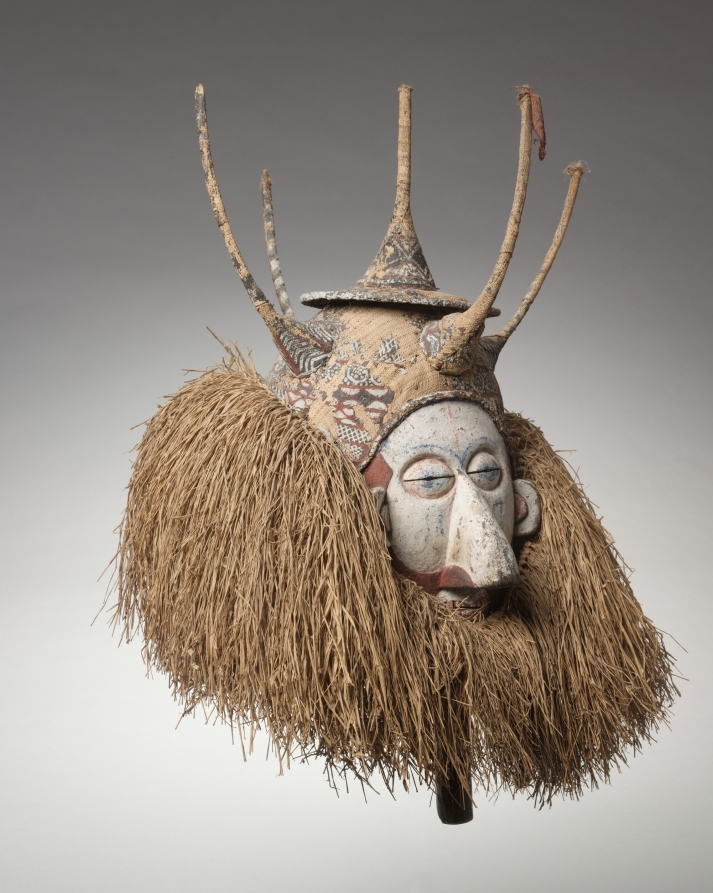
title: Mask (ndeemba)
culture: Africa, Central Africa, Democratic Republic of Congo, Yaka-style carver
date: early 1900s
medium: Wood, raffia, paint, and cotton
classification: Mask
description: This Mask (Ndeemba) has been featured prominently in the African galleries since making its debut at the Cleveland Museum of Art in 1962. Dated to the 1900s, the object is part of a group of eight masks that appear at the end of the circumcision and puberty ritual (n-khanda) for Yaka boys. It would have marked the new status of the boys who became men and commemorated their re-entry into the village. Affirming age-long tradition, such masks are worn by the master of the initiation or by the newly initiated himself.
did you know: Look under the fluffy layers of raffia fiber to see the handle; this mask was "worn" by holding it up to the face.